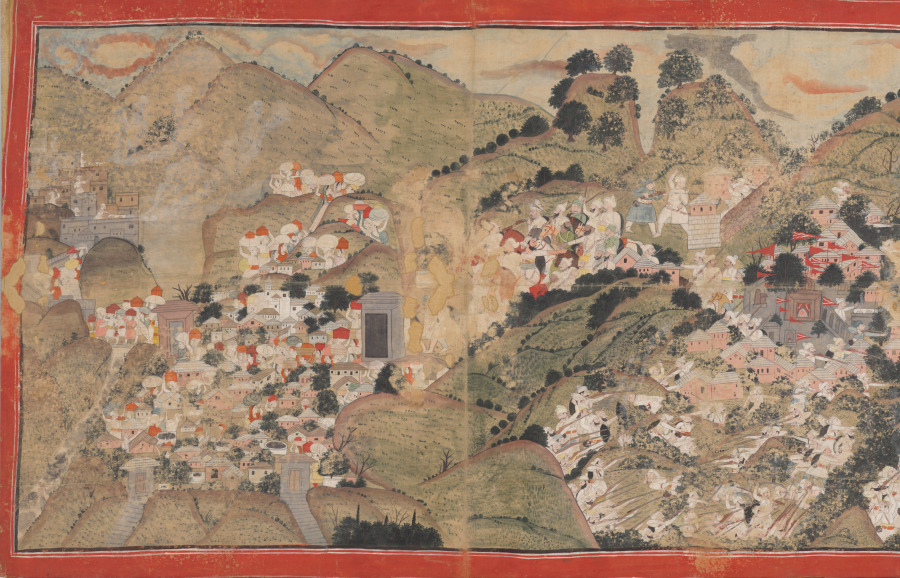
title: Raja Sansar Chand attacking Kangra Fort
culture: Northern India, Pahari kingdom of Kangra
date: after 1782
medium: Gum tempera, ink, and gold on cotton cloth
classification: Painting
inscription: Inscriptions in Takri and Persian. Persian reads: “On the 23rd of the month of Kartik, Samvat 1839 (1782 AD) Sri Maharaja Sansar Chand Bahadur attached Lakkarkot (Nagrakot ?) and the fortress of Kangra, attained victory and made siege intrenchments at the fortress of Kot Kangra.”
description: In 1782, the 17-year-old king of Kangra fought to retake his ancestral kingdom from the Mughals, who had controlled the territory since 1620. He rides a dark brown horse in front of the camel at the far right, blending in among his army and allies. The leftmost panel shows the residents of Kangra fleeing the conflict with their belongings on their heads to the safety of the fortress at the far left, from the walls where cannons are being fired. The main temple, built of gray stone, is in the middle of the composition, marked by red flags.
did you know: The king is 17 years old, beardless, riding a dark brown steed in front of the camel at the far right.